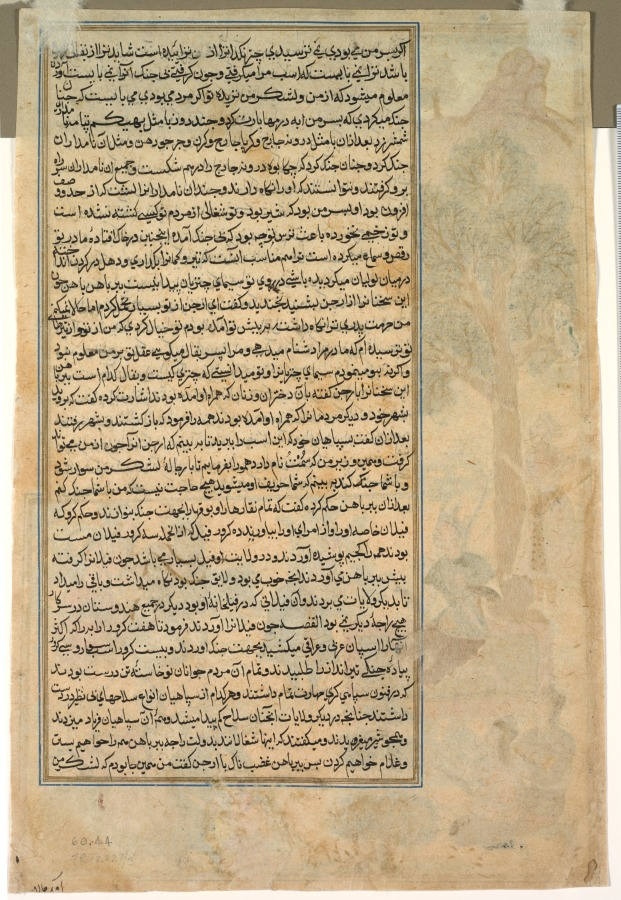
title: Vabhruvahana Approaches Arjuna, page from the Khan Khanan's Razm-nama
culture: India, Subimperial Mughal school, 17th century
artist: Sur Das Gujarati (Indian, active 16th century)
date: c. 1610?–17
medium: Gum tempera, ink, and gold on paper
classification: Painting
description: A tree with a whimsically mint-green trunk populated with birds and nests with eggs appears to the left of the block of text, in which the action below is described in Persian. Under the tree on a blanket is Arjuna, one of the main heroes of the Razm-nama. He is an extraordinary warrior and holds his bow as he receives his son Vabhruvahana, who has come to apologize for having captured the horse of the royal horse sacrifice––a major indiscretion.